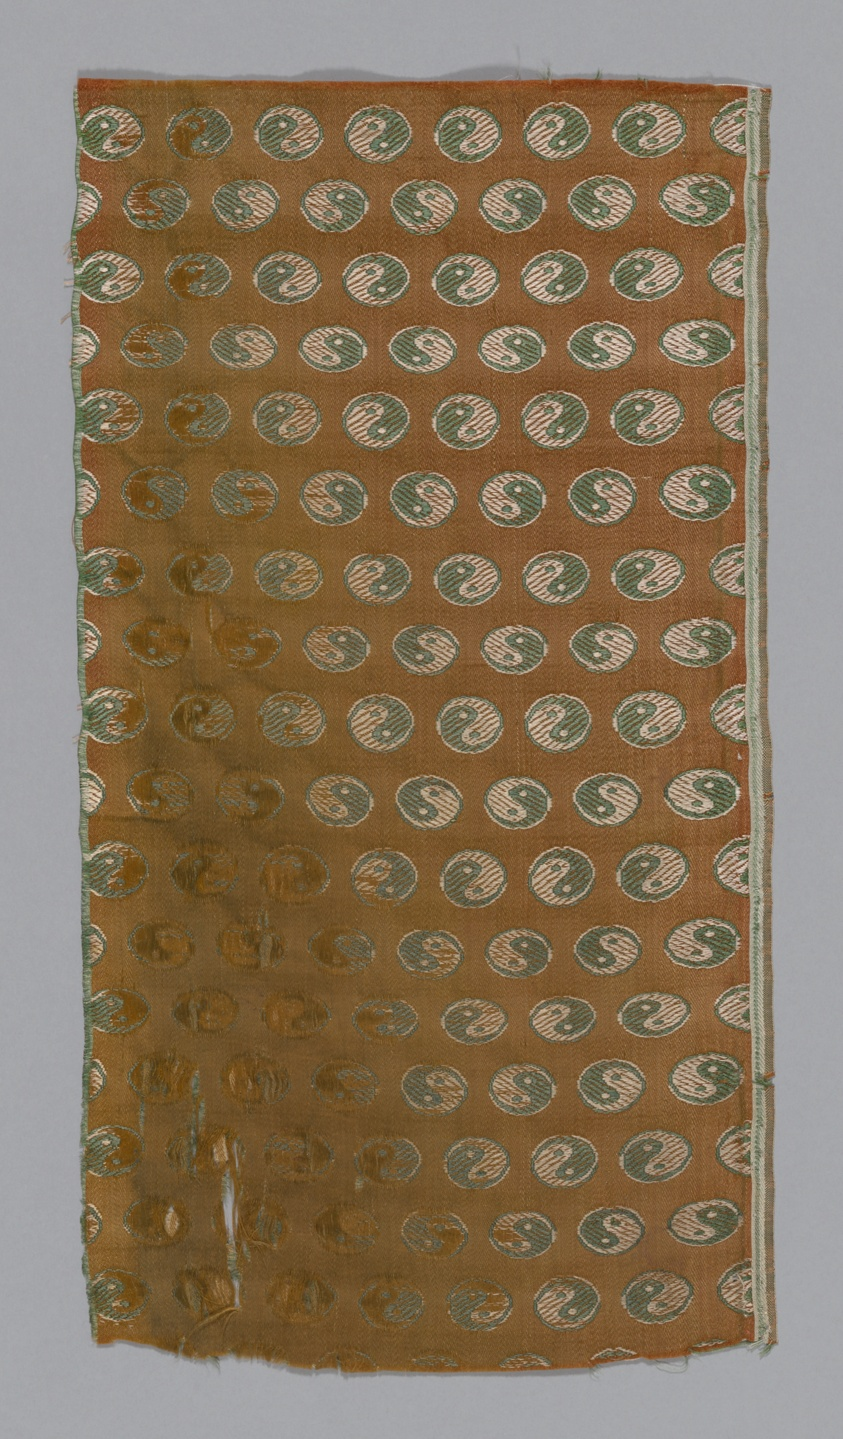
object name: Textile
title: Fragment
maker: China or Japan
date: 18th century, late Edo period (1789–1868)/ Meiji period (1868–1912)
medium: 38.1 x 20.3 cm (15 x 8 in.)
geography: Japan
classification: weaving; textile